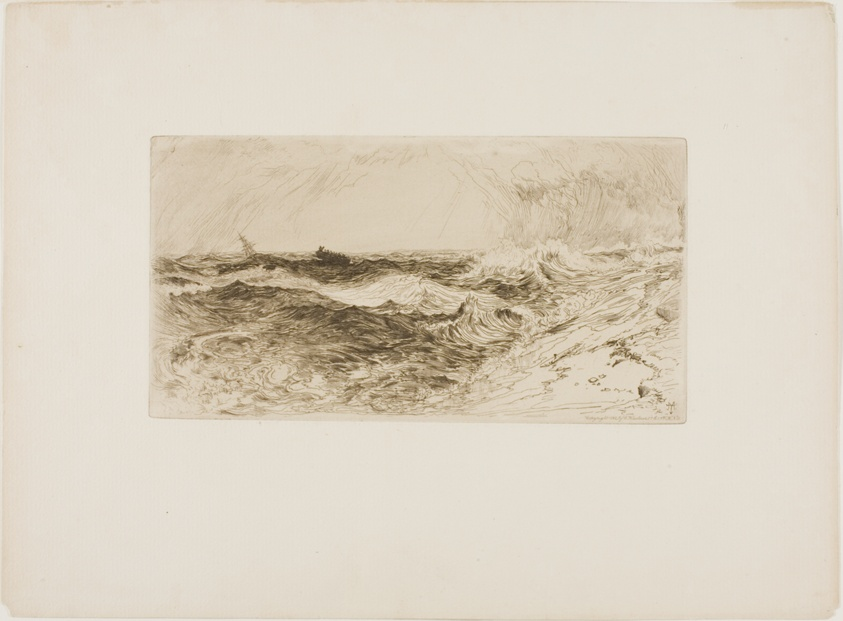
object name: Print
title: The Resounding Sea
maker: Thomas Moran (American, born England, 1837-1926)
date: 1886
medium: Etching on cream laid paper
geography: United States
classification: etching; print; prints and drawing